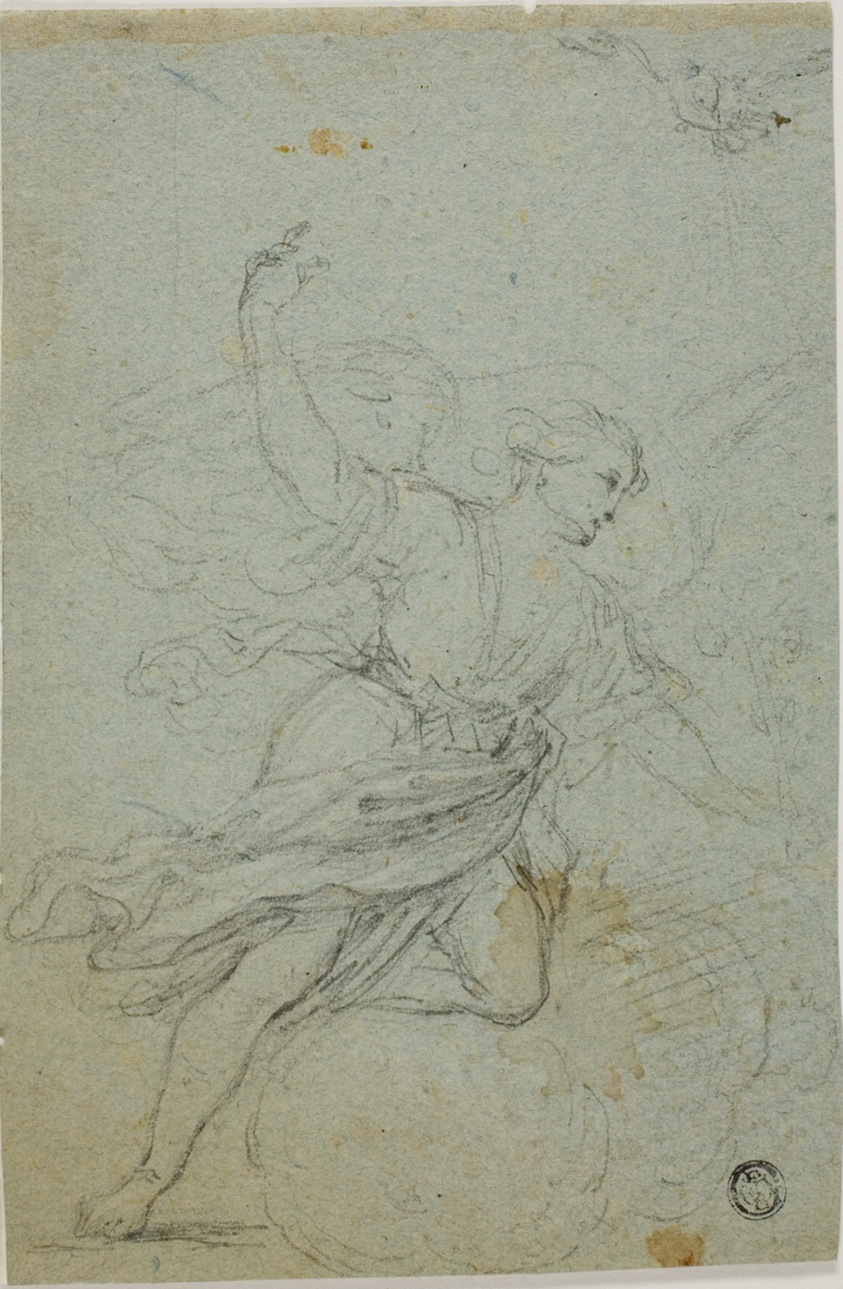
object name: Drawing and Watercolor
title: Angel Annunciate (recto); Samson and the Lion (verso)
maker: School of Guido Reni (Italian, 1575-1642)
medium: Black chalk, heightened with traces of white chalk (recto), and blach chalk (verso), on blue laid paper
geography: Italy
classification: drawings (visual works); prints and drawing